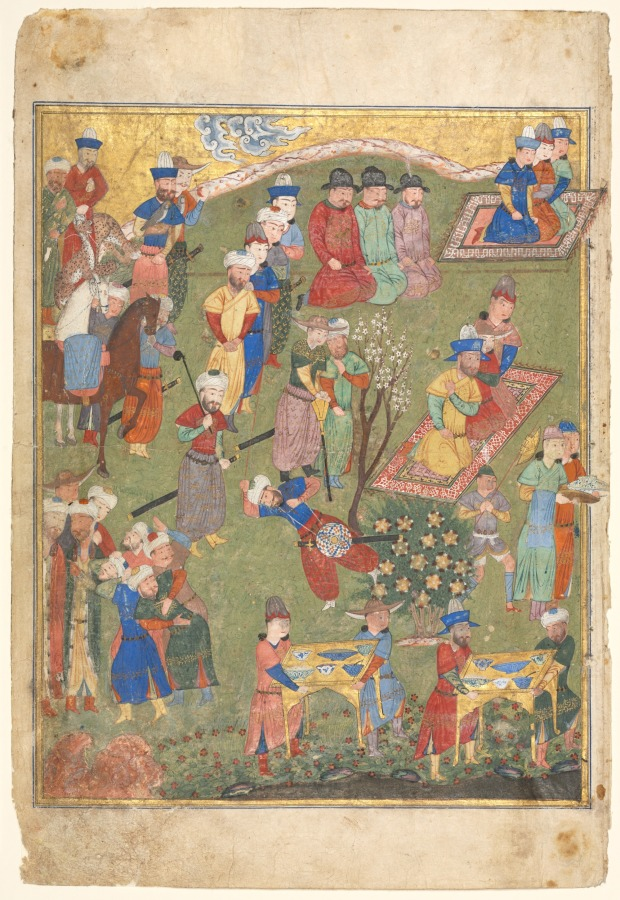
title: Royal Reception in a Landscape, left folio from the double frontispiece of a Shahnama (Book of Kings) of Firdausi (Persian, about 940–1019 or 1025)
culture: Iran, Shiraz, Timurid period (1370-1501)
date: 1444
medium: opaque watercolor, ink, gold and silver on paper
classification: Manuscript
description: The painting on the recto of this folio is the second half of a double-page frontispiece now detached from a Shahnama manuscript (see CMA 1945.169 for the first half of the frontispiece). The scene does not illustrate a narrative from the Shahnama, but likely represents the courtly audience for whose entertainment the manuscript was created. The date and style of the painting indicate that it was made during the reign of the Timurid dynasty in Shiraz, Iran.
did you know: From the upper left two trained cheetahs, a falcon, and horses are led into the scene.